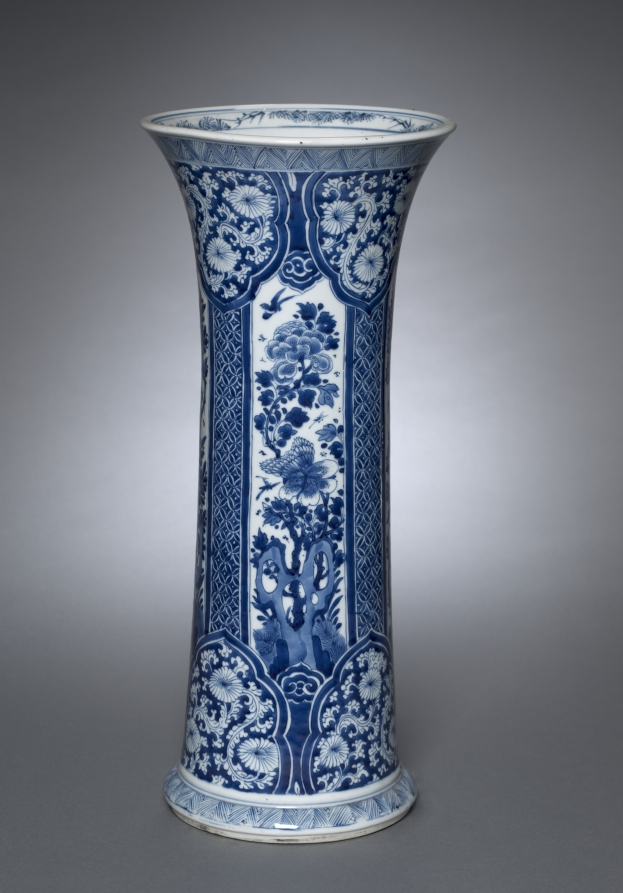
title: Vase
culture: China, Jiangxi province, Jingdezhen kilns, Qing dynasty (1644–1911), Kangxi reign (1662–1722)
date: 1662–1722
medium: porcelain with underglaze blue decoration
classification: Ceramic